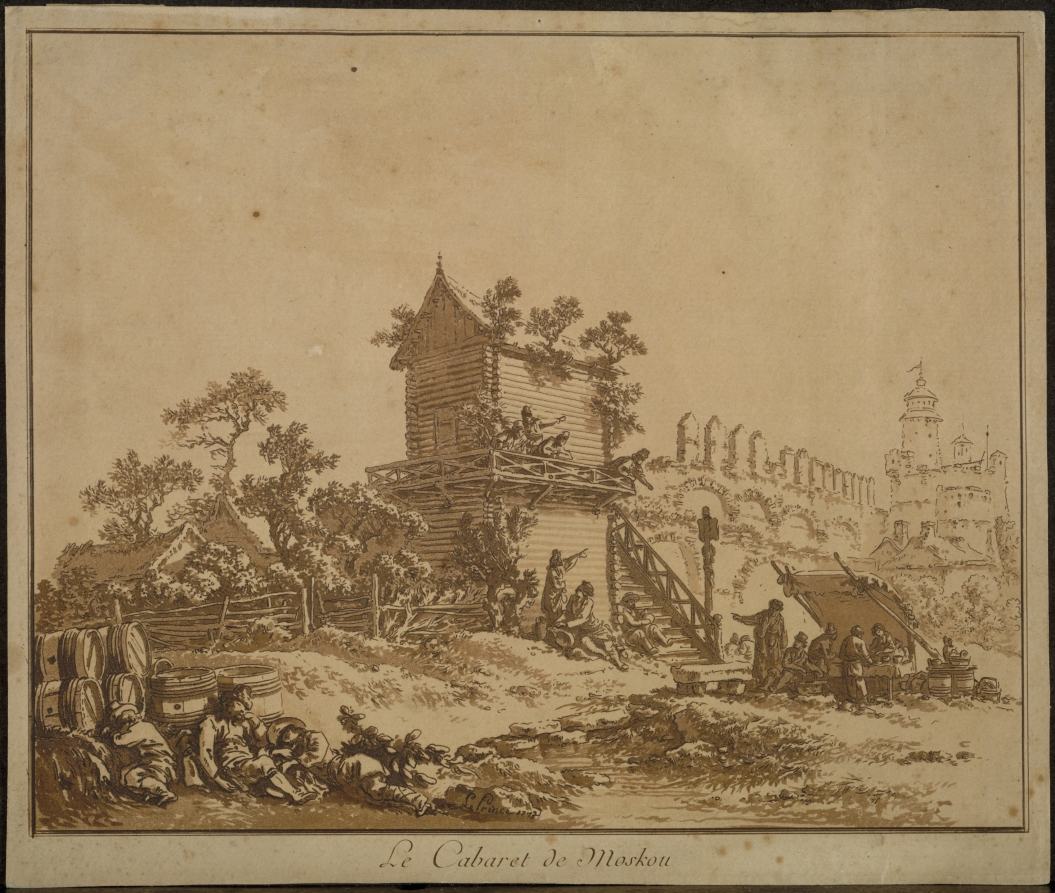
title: The Moscow Tavern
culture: France, 18th century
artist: Jean Baptiste Le Prince (French, 1734–1781)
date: c. 1773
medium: Pen and brown ink and brush and brown and gray wash on white laid paper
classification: Drawing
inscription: on overmount, lower center, in brown ink: vue prise De [la Coup?] [illegible] R[illegible]; verso of secondary support, upper left, in graphite: 836 [underlined]; upper left, in graphite: 603 / xl; lower center, in graphite: 65000 [r?][r underlined] Dessin avec la / gravure; lower left, in graphite: Leprince [underlined]; lower right, in graphite: cl 3419; lower center, in graphite: Cabaret de Moscou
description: French art during the 1700s often reflects an interest in the exotic, especially in imagery of lands then perceived as far away and unusual-such as Turkey and China, places with religions and cultural practices different from those of Western Europe. Le Prince developed his own type of exotic imagery based on the peoples and customs of Russia. But unlike most artists, who fabricated fantastic visions of such places, he based his work on his own observations made in Russia between 1758 and 1763. After returning to Paris, Le Prince continued to rely on his Russian experiences for artistic subject matter. This drawing shows a rustic structure built as an outdoor pleasure garden and drinking establishment. Le Prince, who was an innovative printmaker, developed the medium known as aquatint, which allowed artists to translate the broad tonal washes of ink drawing into a type of etching. Le Prince translated this drawing into an aquatint. For more about this technique, see the exhibition about French printmaking on view nearby in galleries 109 and 110.